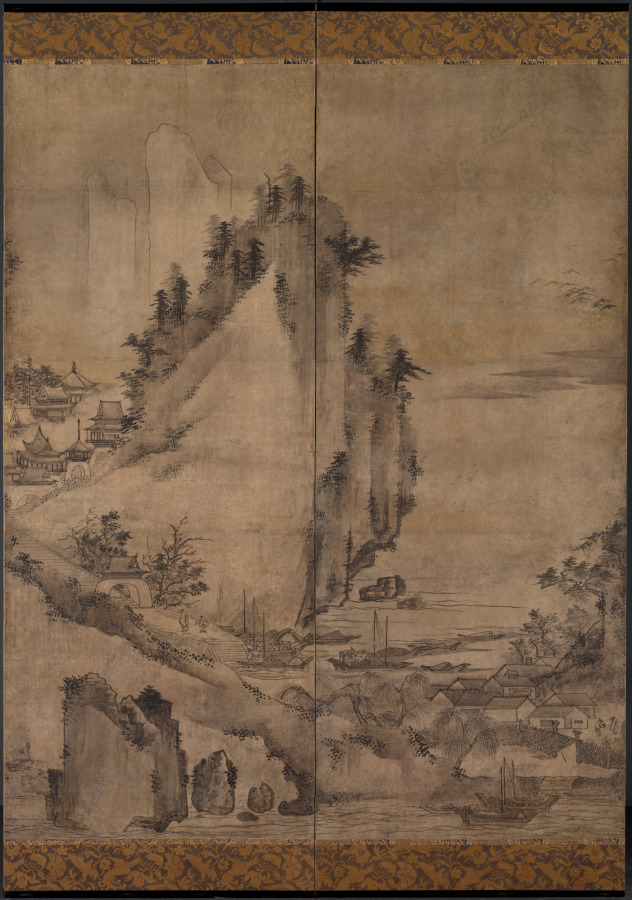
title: Landscape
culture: Japan, Muromachi period (1392–1573)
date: 1550–99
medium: One of a pair of six-panel folding screens; ink and color on paper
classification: Painting